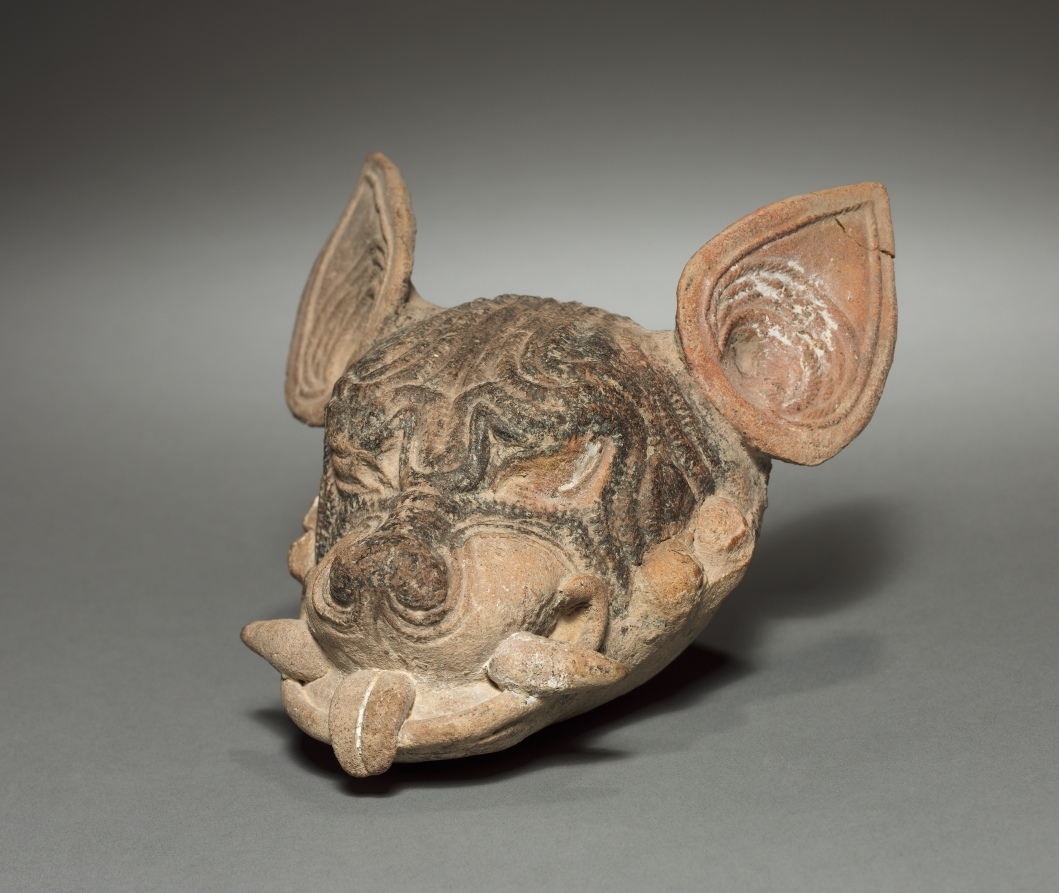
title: Dog Head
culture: Mexico, Gulf Coast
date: 500–1000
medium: earthenware, asphalt and resin paint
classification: Sculpture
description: This dog's snarl and protruding fangs lend him a sinister expression. Although pierced for suspension, the head seems too large and fragile to have been a pendant. Press-molds, used to create the dog's face and ears, were commonly used in the Gulf Coast region, where asphalt occurs naturally and was applied to pottery as a paint after firing.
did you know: This ceramic was analyzed using thermoluminescence dating; it was fired between 900 and 1,500 years ago.